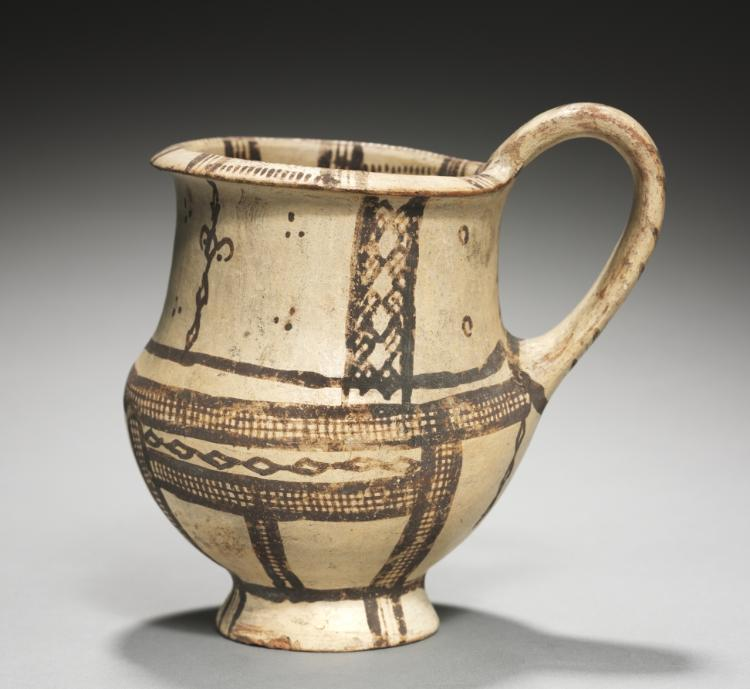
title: Jug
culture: Cyprus, late Cypriot II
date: c. 1450–1200 BCE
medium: white slip ware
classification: Ceramic